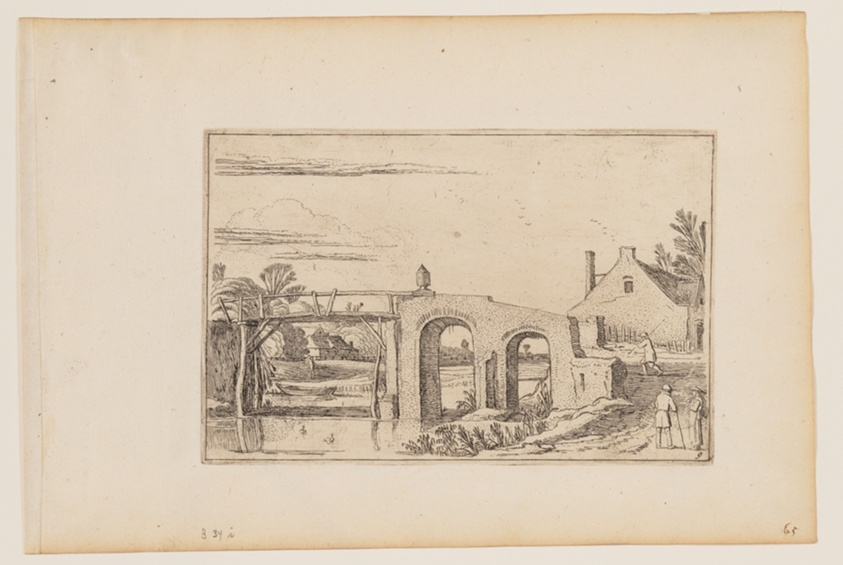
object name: Print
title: Path to Right of a Wooden and Stone Bridge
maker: Esaias van de Velde; Dutch, 1587–1630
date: c. 1610-1630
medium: Etching on ivory laid paper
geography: Netherlands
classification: etching; paper; print; prints and drawing